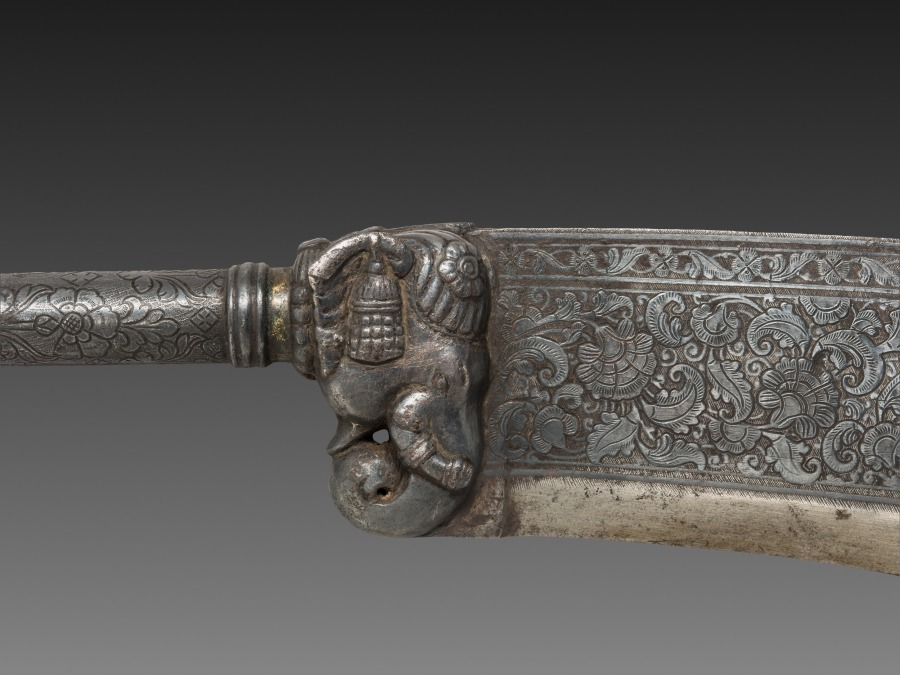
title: Battle Axe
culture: India, Sind, Kach tribe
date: c. 1800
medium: steel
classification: Arms and Armor